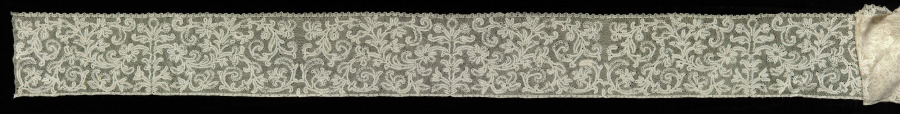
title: Lace Flounce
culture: Italy, Milan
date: 1700s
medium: Bobbin lace (Punto di Milano)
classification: Lace